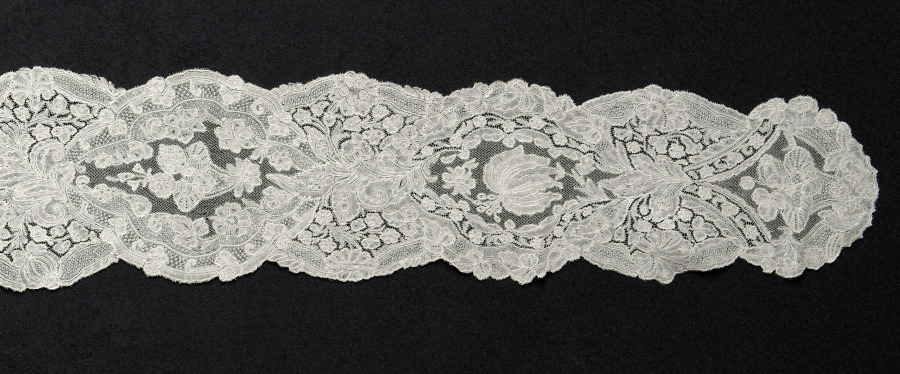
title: Lace Lappet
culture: Belgium, Brussels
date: 1700s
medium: Linen: bobbin lace (Point d'Angleterre)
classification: Lace